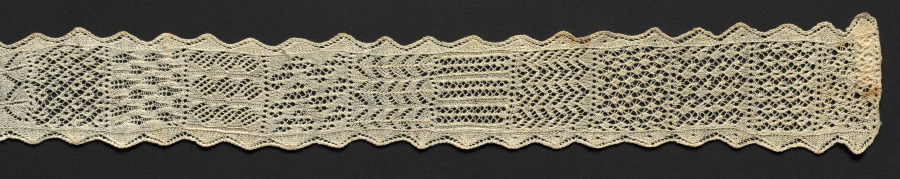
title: Knitted Lace Sampler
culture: Italy, Sienna, 19th century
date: 19th century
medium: knitted linen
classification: Sampler